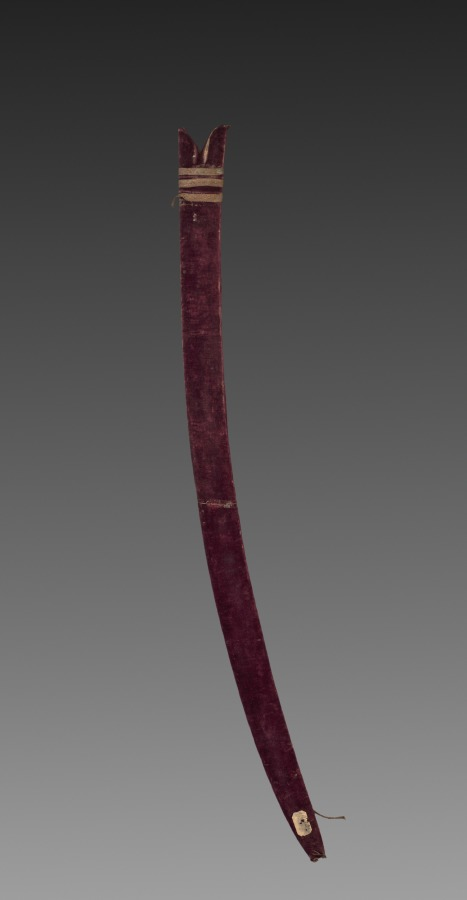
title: Tulwar Sword (case)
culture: India, probably Deccan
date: 1700s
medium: wood scabbard with velvet and metallic thread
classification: Arms and Armor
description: This long curved sword and scabbard are of the kind used and worn by Mughal nobility, as seen often in paintings. The openwork hilt is characteristic of swords from the southern Indian region known as the Deccan. By the end of the 1500s, the Mughals began making regular incursions into the Deccan as they attempted to expand their empire, increasing the exchange of art forms.